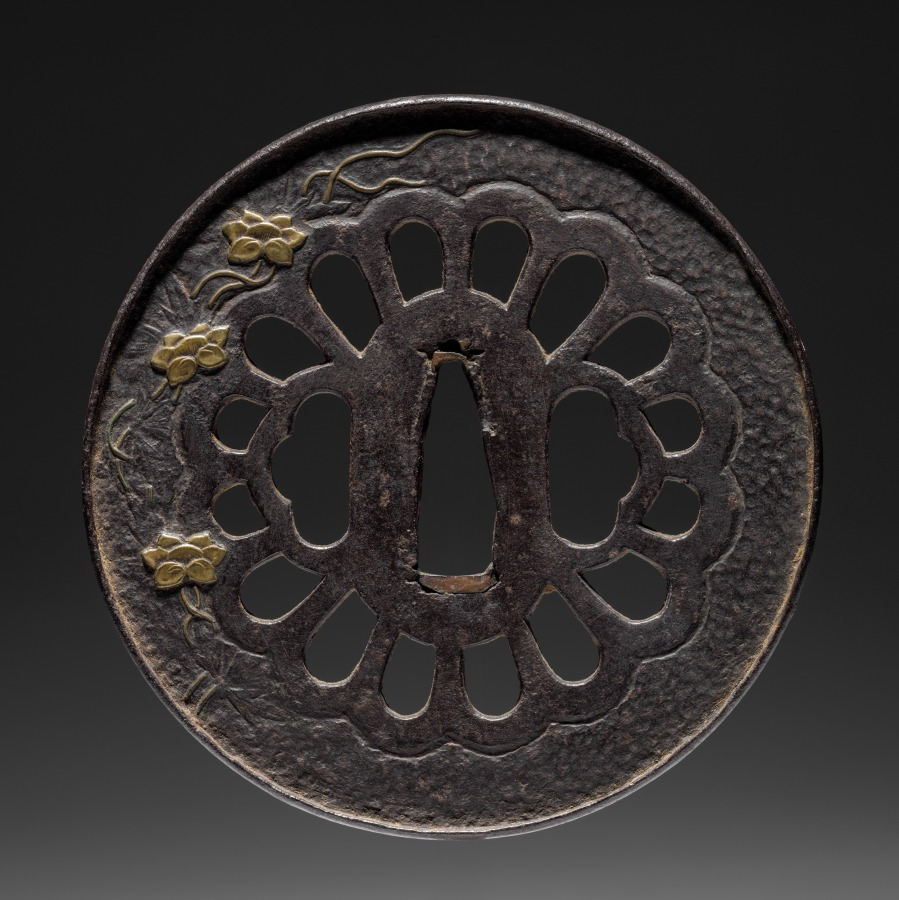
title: Sword Guard (Tsuba)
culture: Japan, possibly Edo period (1615-1868)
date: c. 1615–1868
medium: iron with brass inlay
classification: Arms and Armor